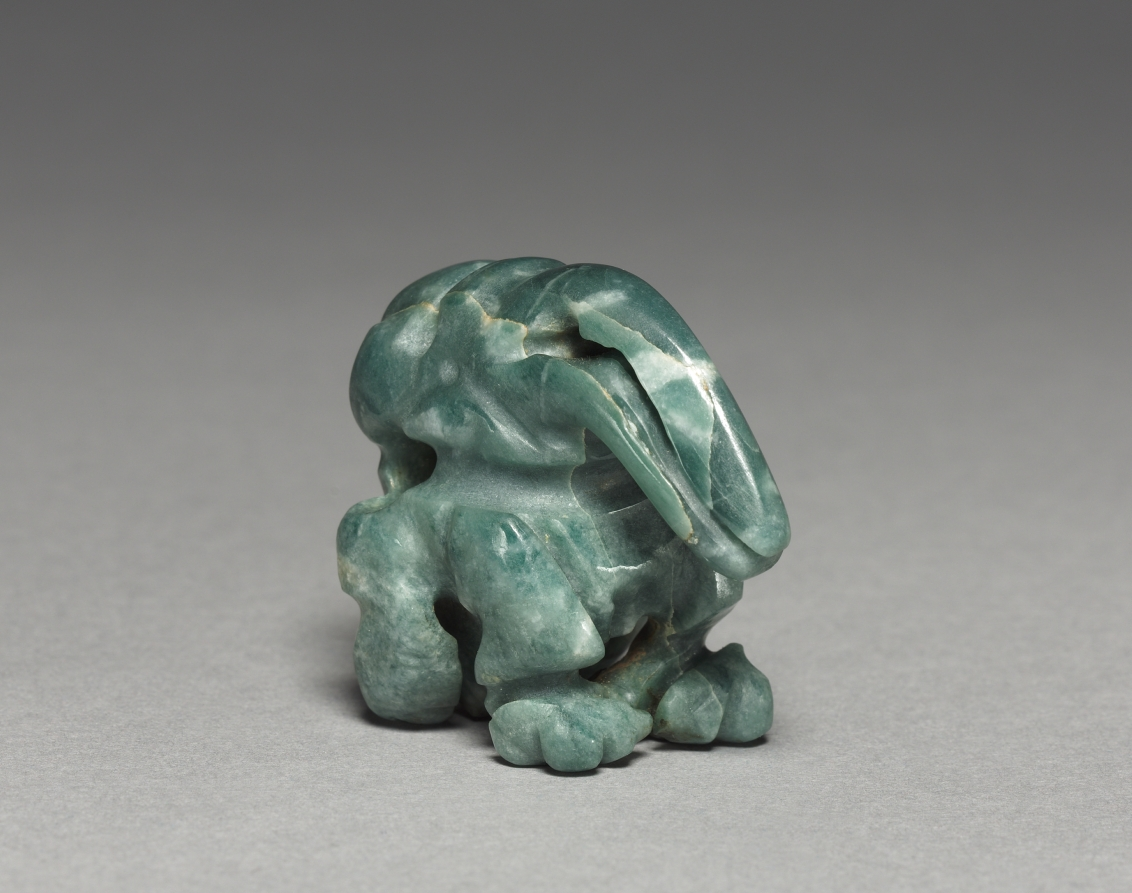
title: Bird Pendant (Buzzard or Vulture?)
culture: Costa Rica, Atlantic Watershed region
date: c. 300 BCE–600 CE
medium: jadeite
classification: Jewelry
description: Before about AD 500, when gold-working technologies were adopted in Costa Rica, jade was the quintessential luxury material and it was masterfully carved into exquisite ornaments of many kinds. Ancient Americans did not use many metal tools, and artists carved jade, a tough stone, with implements of stone, bone, bamboo, or reed.